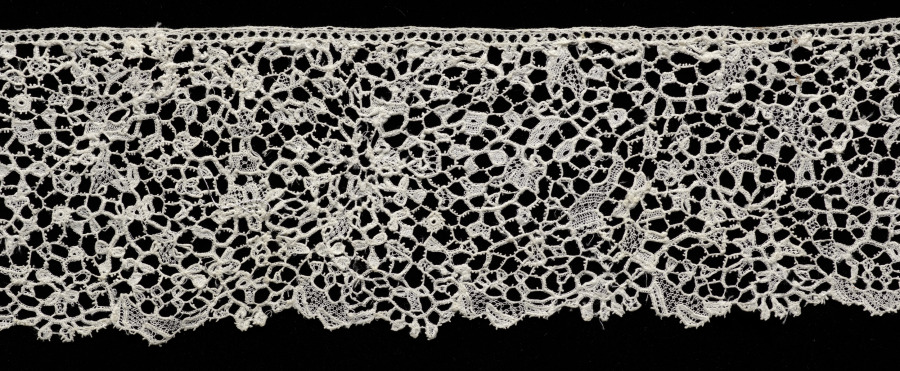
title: Lace Edging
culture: Belgium, Brussels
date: early 1700s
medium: Linen: needle lace (Point d'Angleterre)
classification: Lace